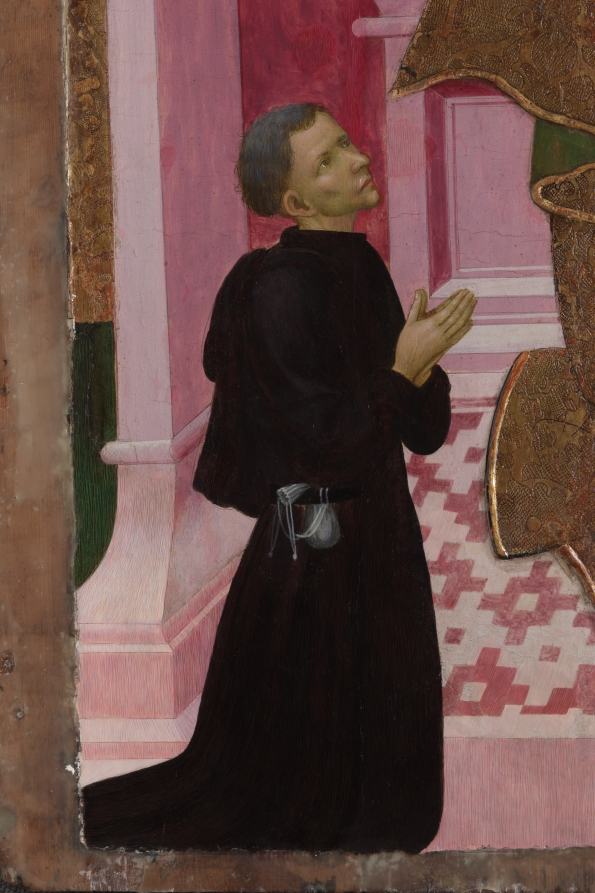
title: A Bishop Saint with a Donor (Saint Louis of Toulouse?)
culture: Spain, Catalonia, early 15th century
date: early 1400s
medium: tempera with raised and gilded gesso on wood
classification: Painting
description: The style of this painting suggests that it comes from Catalonia in northeastern Spain, though the identity of its artist remains unknown. The painting represents a youthful bishop-saint identifiable by a bishop’s symbols of authority, his miter and crozier. He wears rich vestments. Below, the figure in black represents the donor of the painting—likely a wealthy layperson rather than a cleric. The identity of the saintly bishop is speculated to be Saint Louis, Bishop of Toulouse, on the basis of his youth. Louis was consecrated Bishop of Toulouse in 1297, died six months later at the age of 23, and was canonized in 1317. His relics were moved in 1423 to Valencia and his cult flourished in Spain.